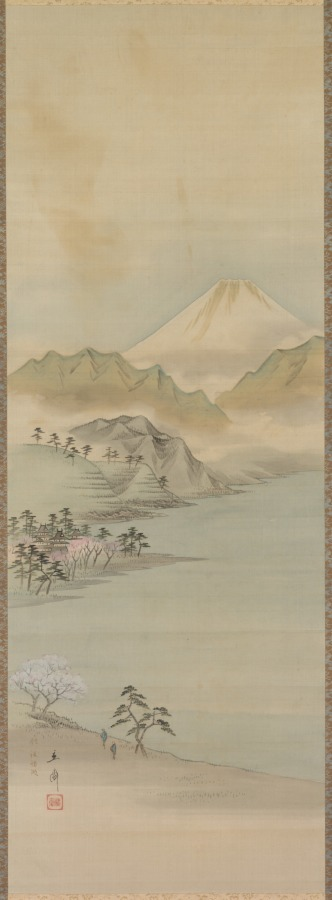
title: Lake Suwa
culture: Japan, Edo period (1615–1868)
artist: Utagawa Hiroshige (Japanese, 1797–1858)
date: c. 1832–58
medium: hanging scroll; ink and color on silk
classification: Painting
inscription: 立斎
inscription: 廣重